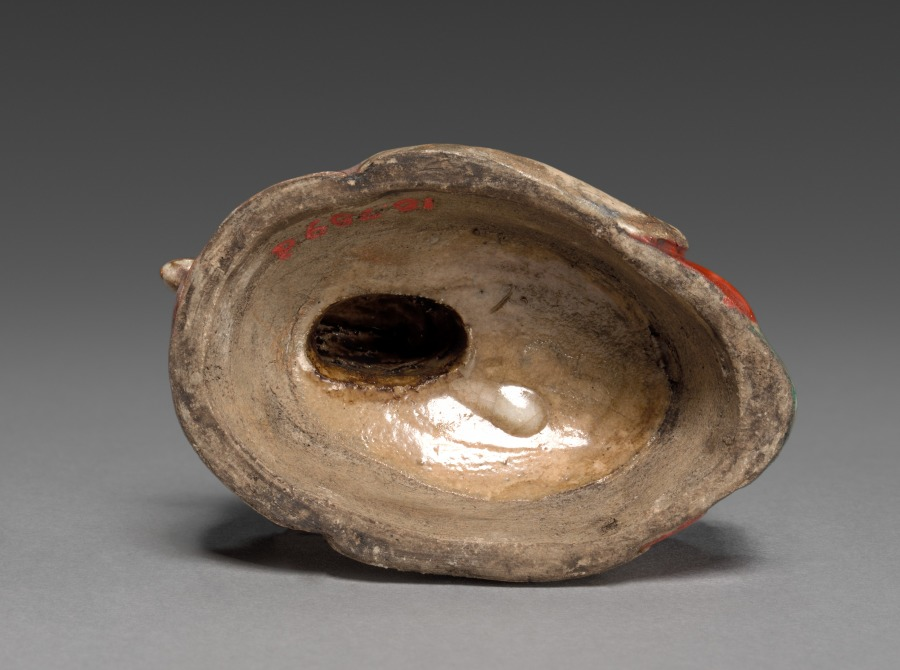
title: Lid of Incense Container (Kōgō) in the Shape of a Mandarin Duck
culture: Japan, Edo period (1615–1868)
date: c. 1700–1868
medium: pottery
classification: Ceramic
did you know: The artist incised the bird's feet on the bottom of the box.